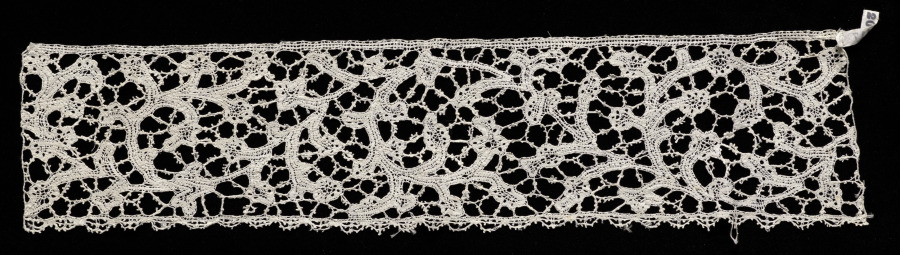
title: Lace Insertion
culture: Italy, Milan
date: 1500s–1600s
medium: Bobbin lace (bride ground)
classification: Lace